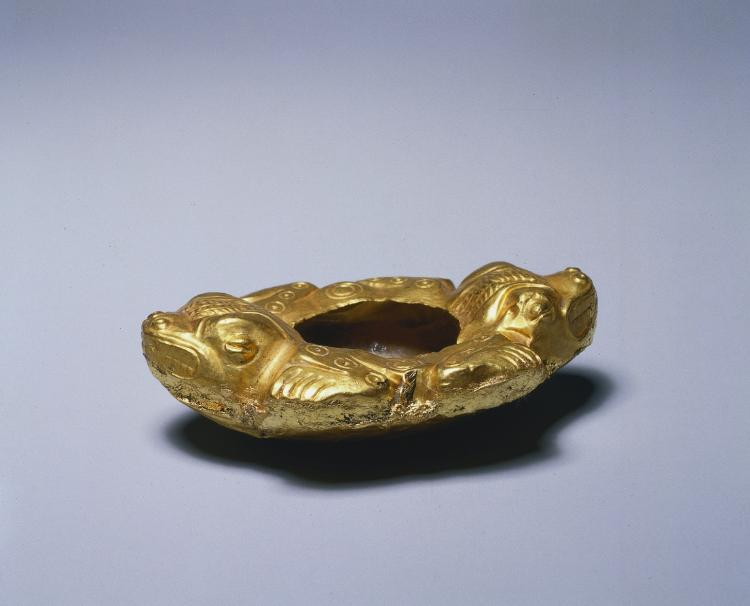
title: Double Crocodile Vessel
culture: Central Panama, (Sitio Conte?), Conte Style, 5th-10th Century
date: c. 400–900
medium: hammered and embossed gold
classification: Metalwork